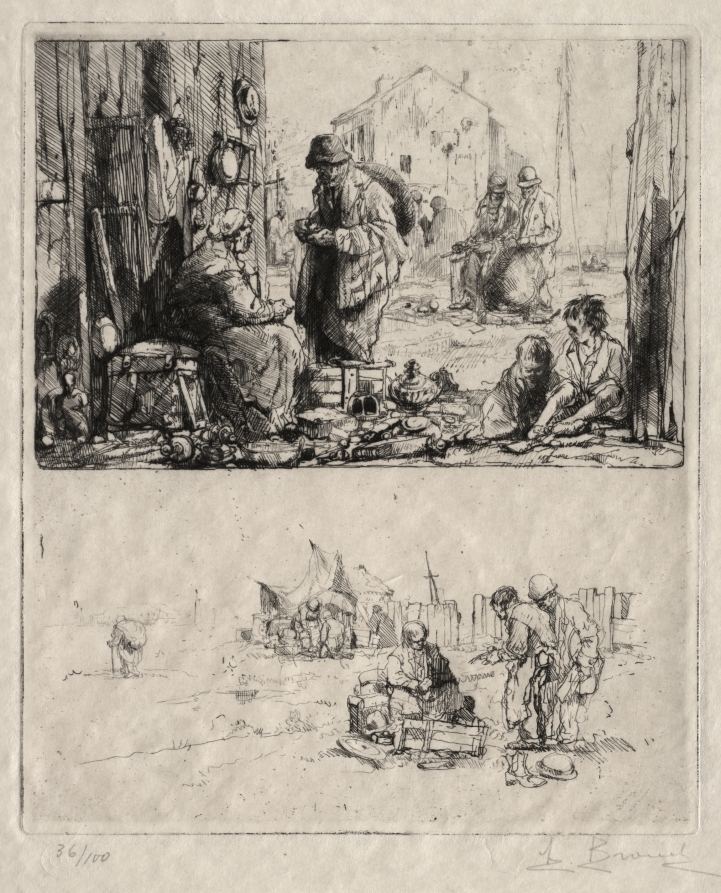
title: On the Fortifications at Saint-Ouen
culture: France, 20th century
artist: Auguste Brouet (French, 1872–1941)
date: c. 1902–41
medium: etching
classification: Print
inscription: in graphite, lower left: 36/100; lower right: A. Brouet